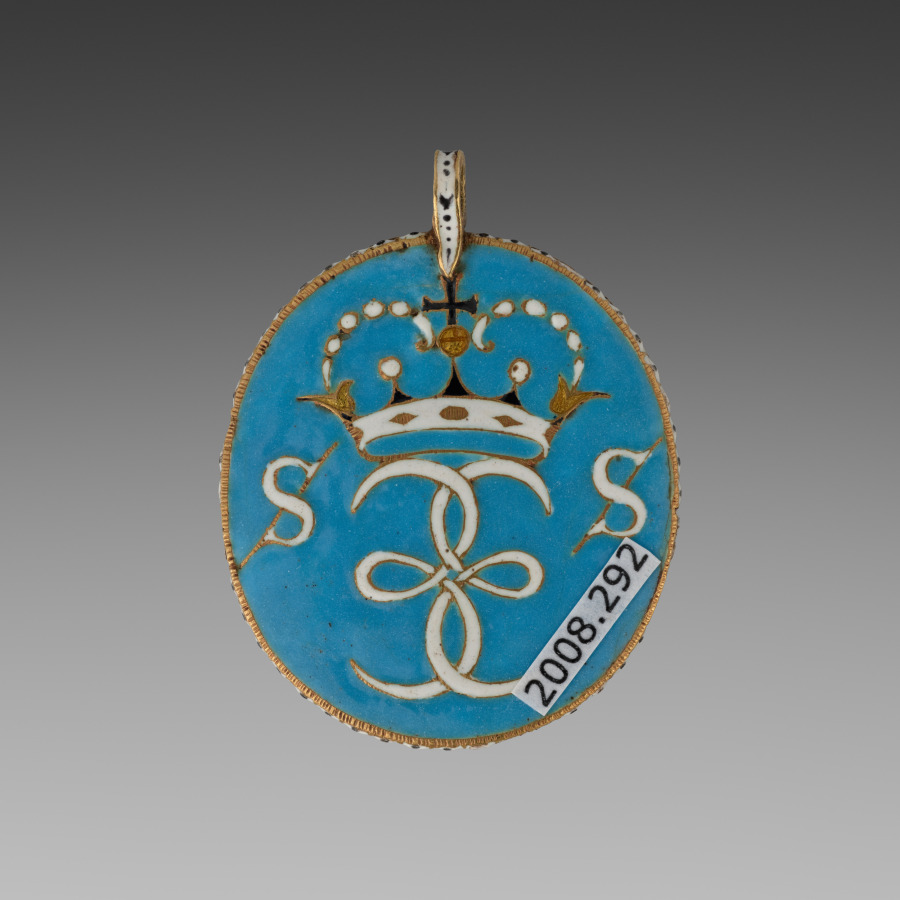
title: Portrait of Elizabeth Stuart, Electress Palatine and Queen of Bohemia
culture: England, 17th century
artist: Alexander Cooper (British, 1609-c. 1658)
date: 1630s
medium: watercolor on vellum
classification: Portrait Miniature